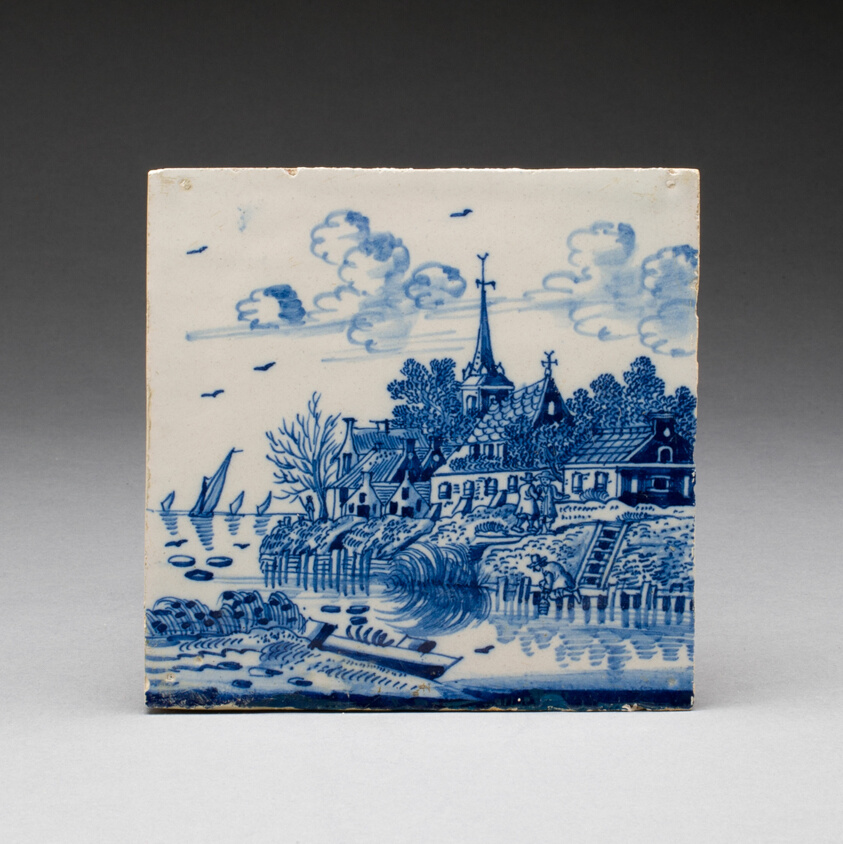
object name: Ceramics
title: Tile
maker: Netherlands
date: 17th/18th century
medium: Tin-glazed earthenware with cobalt decoration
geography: Netherlands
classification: tin-glazed ware; ceramics; european decorative arts; earthenware